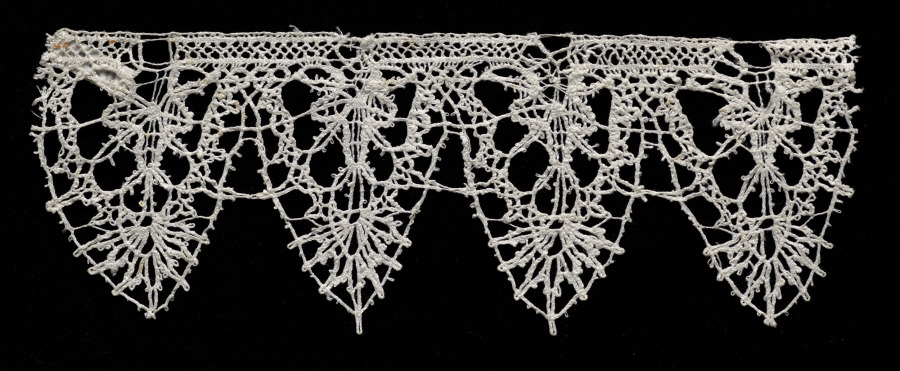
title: Lace Edging with Points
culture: Italy, Genoa(?)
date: 1600s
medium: Bobbin lace (rose lace)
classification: Lace